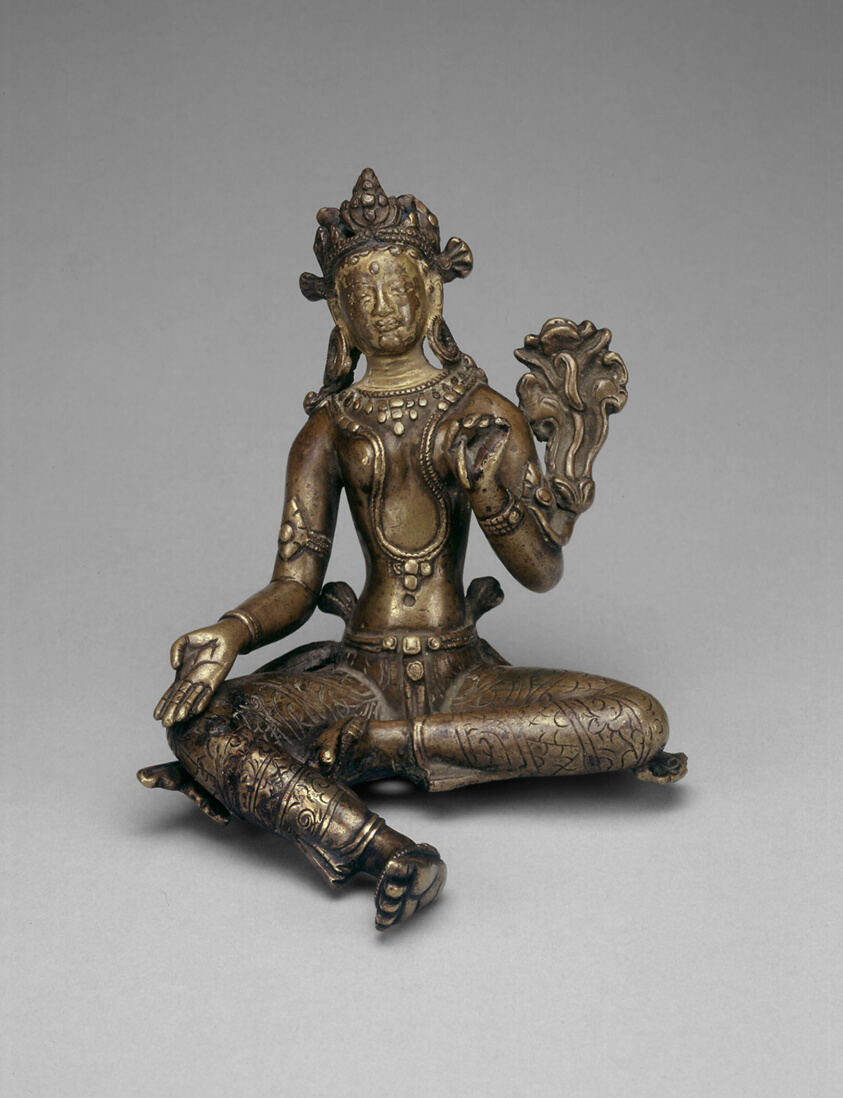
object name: Sculpture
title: Goddess Green Tara Seated with Hand in Gesture of Gift Giving (Varadamudra)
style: Himalayan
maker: Nepal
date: 16th century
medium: Gilt copper alloy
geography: Nepal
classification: copper; metal; sculpture; asian art